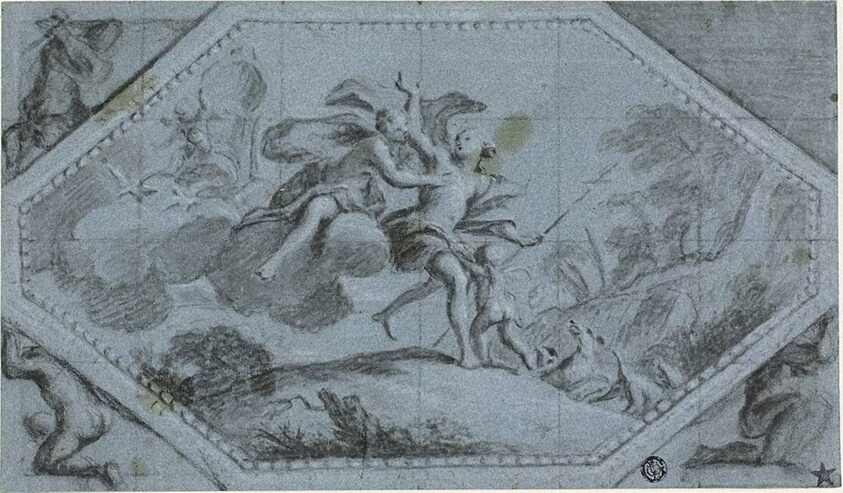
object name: Drawing and Watercolor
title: Ceiling Decoration with Venus and Adonis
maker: Attributed to Giovanni Battista Cipriani; Italian, 1727-1785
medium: Black chalk, heightened with white chalk, squared in black chalk, on blue laid paper, laid down on gray wove paper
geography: Italy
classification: charcoal; drawings (visual works); prints and drawing